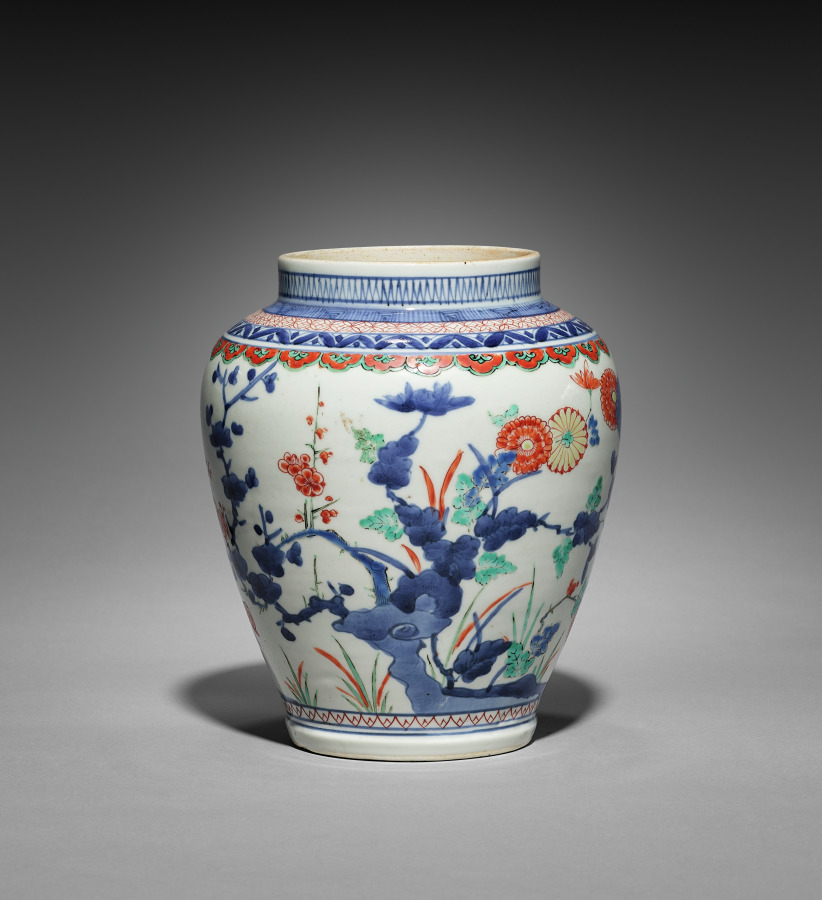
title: Covered Jar with Chrysanthemums, Peonies, and Plum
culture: Japan, Edo period (1615–1868)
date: late 1600s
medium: porcelain with underglaze blue and overglaze color enamel (Hizen ware, Kakiemon type)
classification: Ceramic